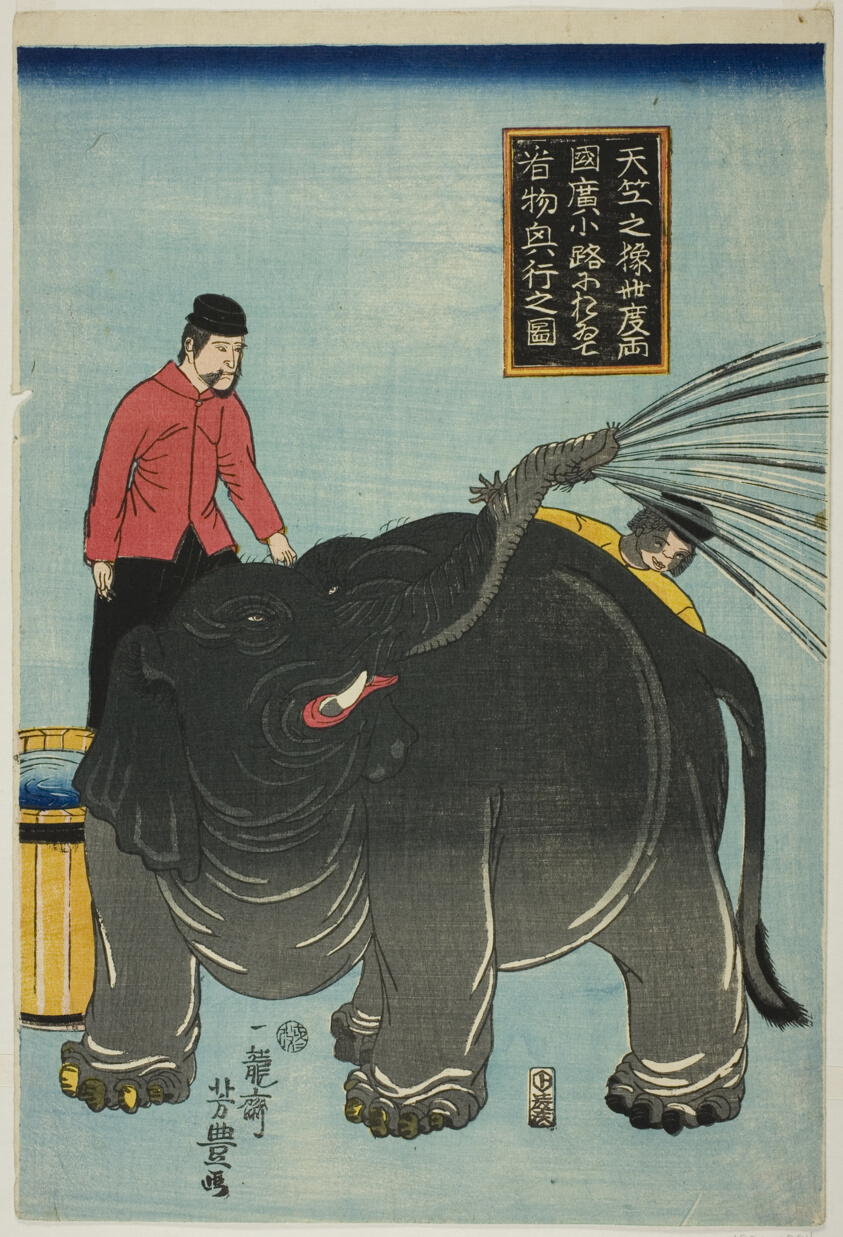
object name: Print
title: Illustration of Elephant from India On Display at Hirokoji in Ryogoku (Tenjiku no zo kotabi Ryogoku Hirokoji ni oite misemono kogyo no zu)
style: Japanese (culture or style)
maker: Utagawa Yoshitoyo (Japanese, 1830–1866)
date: 1863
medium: Color woodblock print; oban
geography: Japan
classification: woodblock print; print; asian art